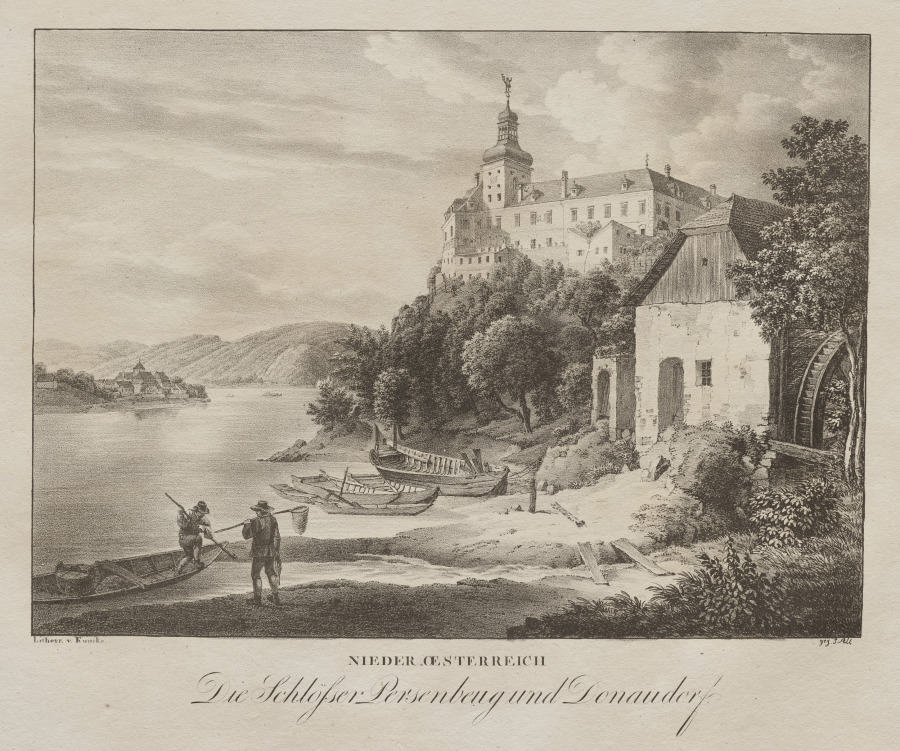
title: Nieder-oesterreich, Die Schlosser Persenbeug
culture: Austria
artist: Jakob Alt (Austrian, 1789–1872)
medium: lithograph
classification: Print